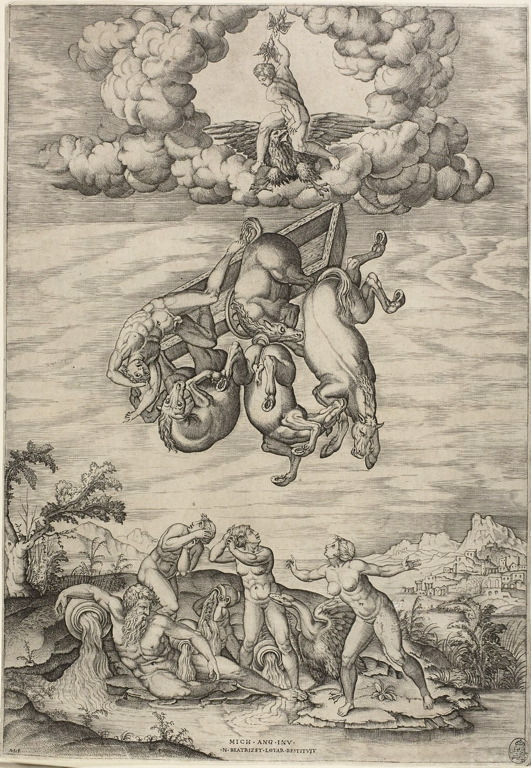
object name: Print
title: The Fall of Phaeton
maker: Nicolas Beatrizet (French, 1515-after 1565); after Michelangelo Buonarroti (Italian, 1475-1564)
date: c. 1540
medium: Engraving on paper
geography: France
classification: etching; print; prints and drawing